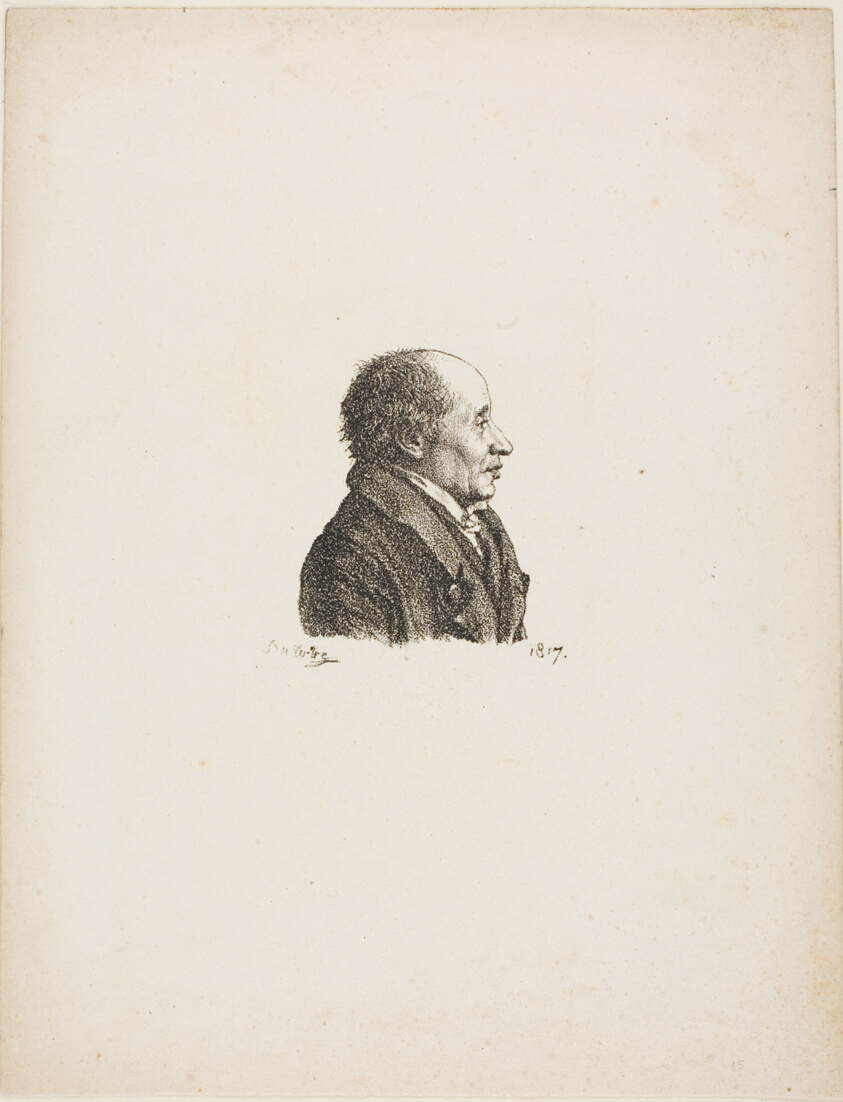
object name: Print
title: Portrait of a Man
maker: André Dutertre (French, 1753-1842)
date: 1817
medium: Lithograph in black on cream wove paper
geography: France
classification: lithograph; print; prints and drawing